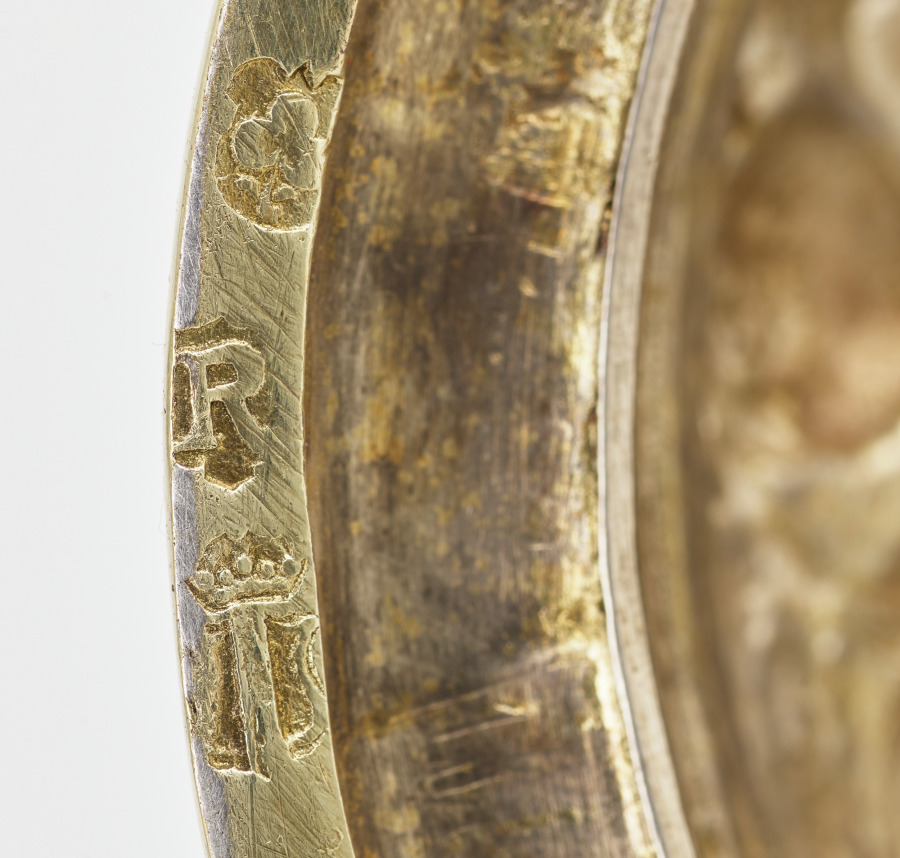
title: Nautilus Cup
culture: Netherlands, Holland, Delft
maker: Cornelis Jansz van der Burch (Dutch, active in Delft, d. 1615)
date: 1607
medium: Silver-gilt, nautilus shell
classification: Metalwork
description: Nautilus shells were brought to the Netherlands from Indonesia. Skilled Dutch silversmiths mounted them in silver, creating luxurious vessels that were sought after by wealthy collectors. Early Dutch nautilus cups are mainly associated with the city of Delft, although only a few other examples made in Delft are known from the late sixteenth and early seventeenth centuries. They feature the dramatic motif of a sea monster’s head.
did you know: The nautilus is a marine mollusk that swims by expelling water from its shell using jet propulsion.